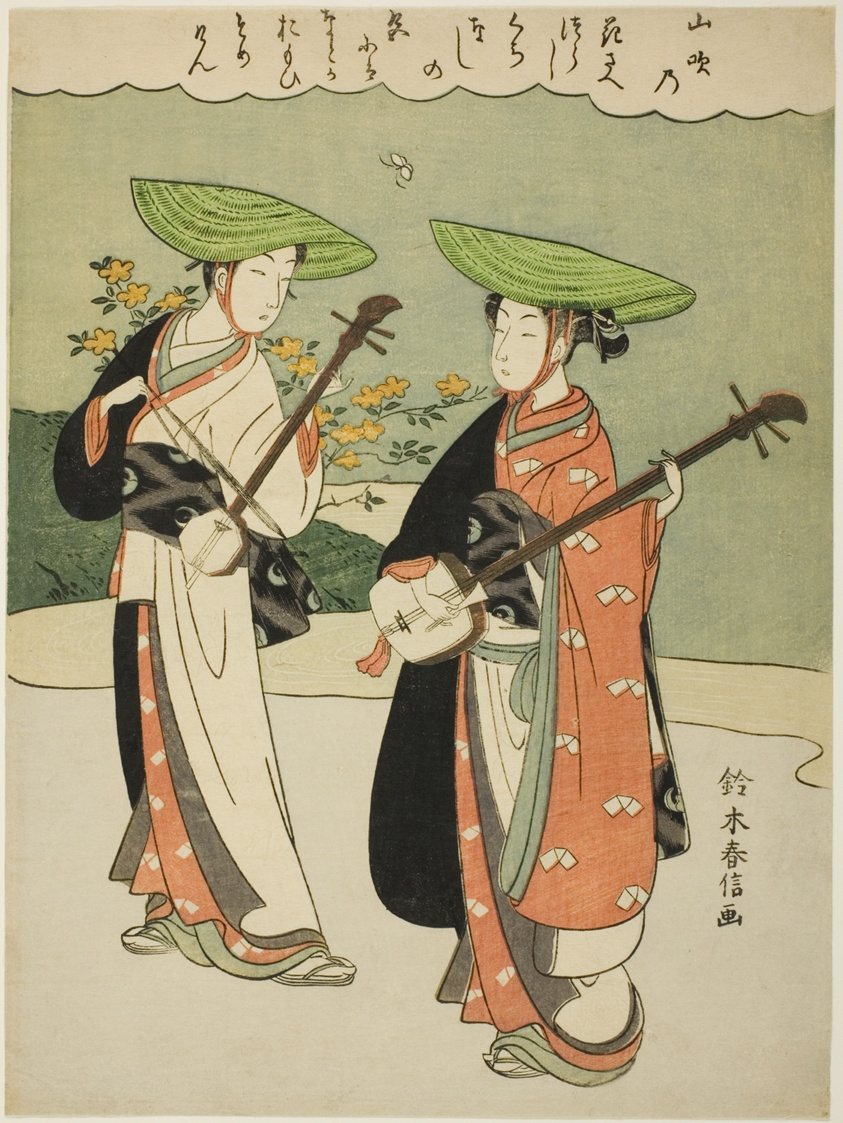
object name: Print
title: Two Itinerant Musicians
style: Japanese (culture or style)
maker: Suzuki Harunobu 鈴木 春信; Japanese, 1725 (?)-1770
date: c. 1765/70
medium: Color woodblock print; chuban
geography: Japan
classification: woodblock print; print; asian art